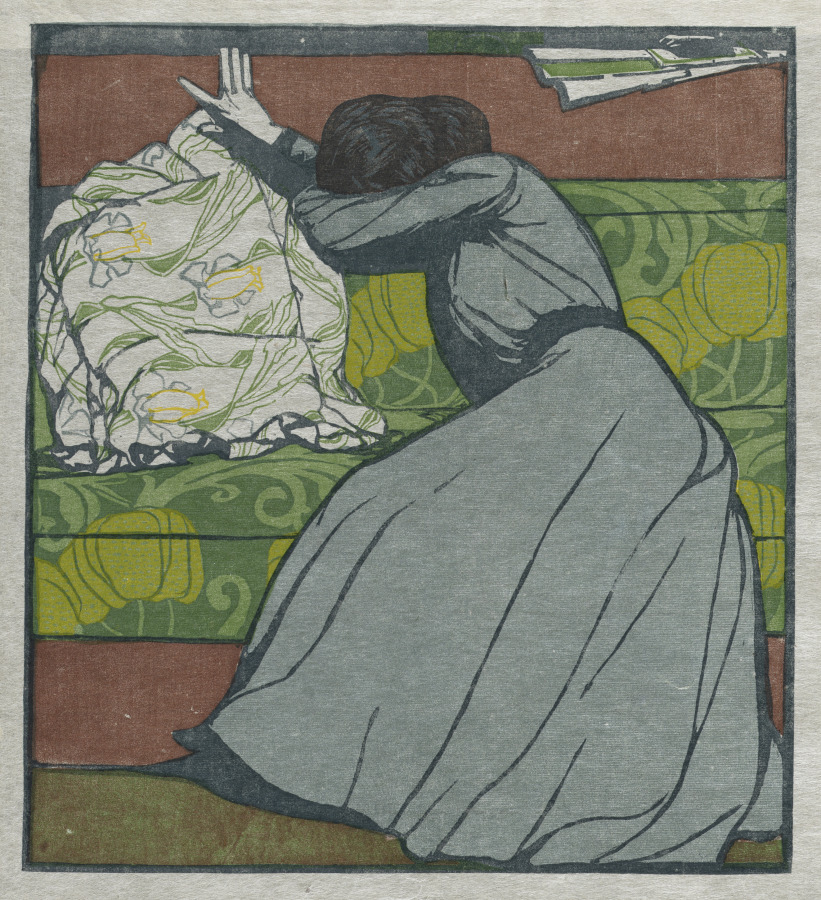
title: The Cushion (Martha Kurzweil Seated on a Divan)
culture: Germany, early 20th Century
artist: Max Kurzweil (Austrian, 1867–1916)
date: 1903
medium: woodcut printed in colors (yellow, green, brown, blue, black)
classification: Print